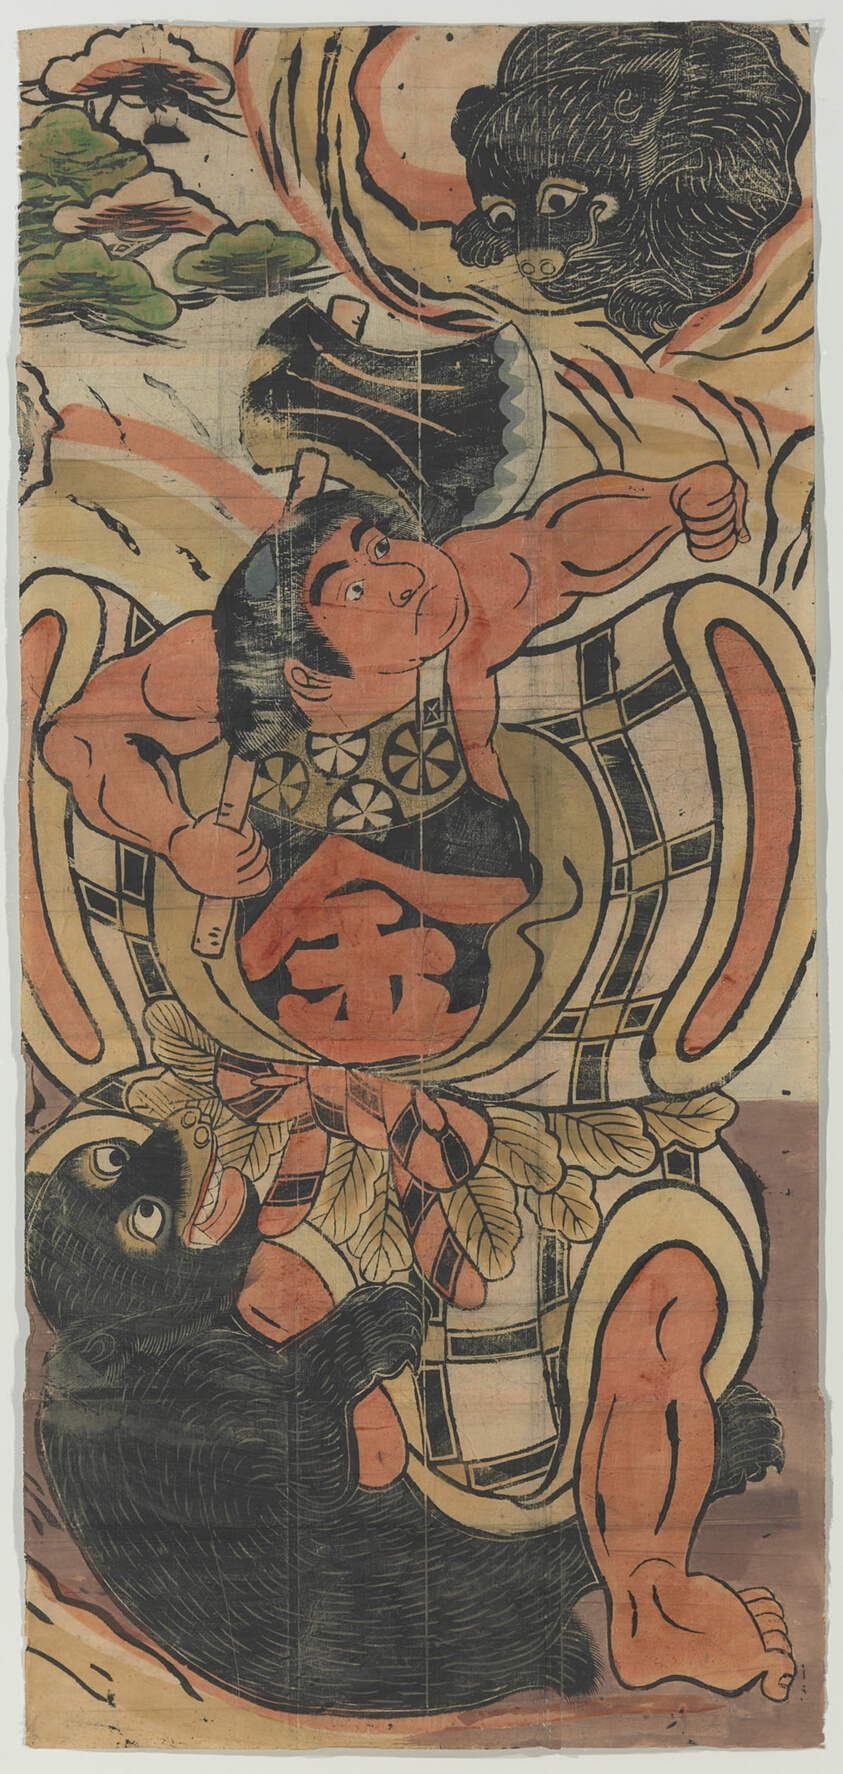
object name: Print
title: Banner Depicting Kintaro Battling Bears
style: Japanese (culture or style)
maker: Artist Unknown; Japanese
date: 18th century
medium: Hand-colored woodblock print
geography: Japan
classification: woodblock print; print